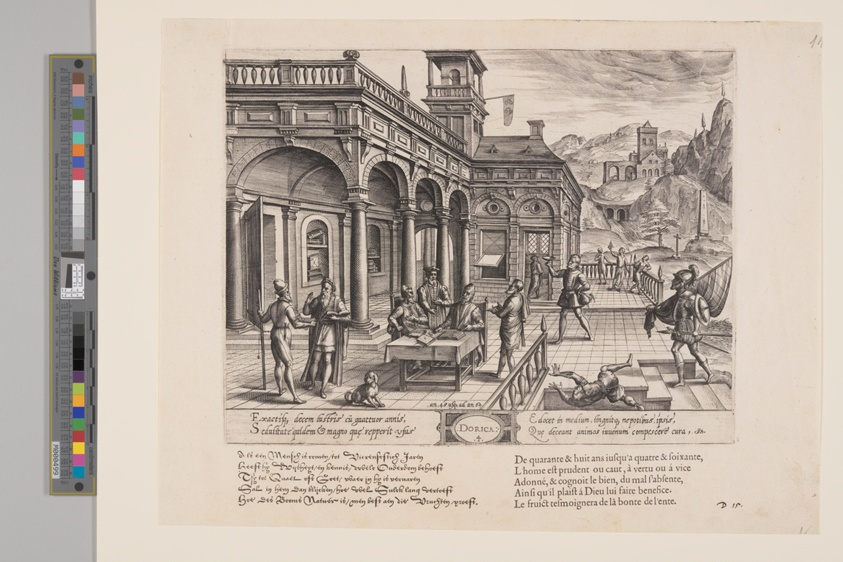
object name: Print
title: Dorica, from Theatrum Vitae Humanae (The Ages of Man)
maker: Jan Wierix (Flemish, 1549–c. 1618)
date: 1577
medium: Engraving on ivory laid paper, with letterpress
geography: Flanders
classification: engraving; paper; print; prints and drawing